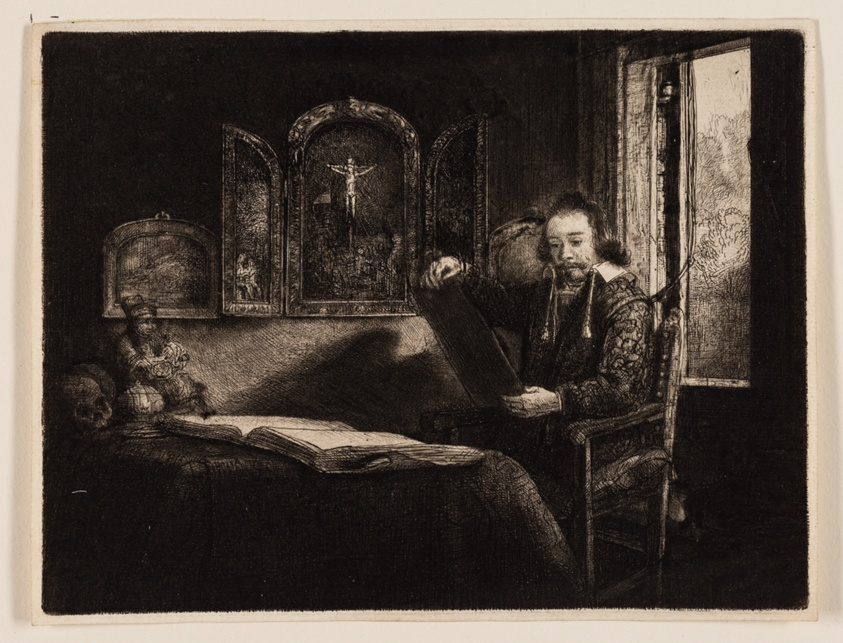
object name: Print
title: Abraham Francen, Apothecary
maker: Rembrandt van Rijn (Dutch, 1606-1669)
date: c. 1657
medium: Etching and drypoint in black on paper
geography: Holland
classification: etching; print; prints and drawing; paper; drypoint